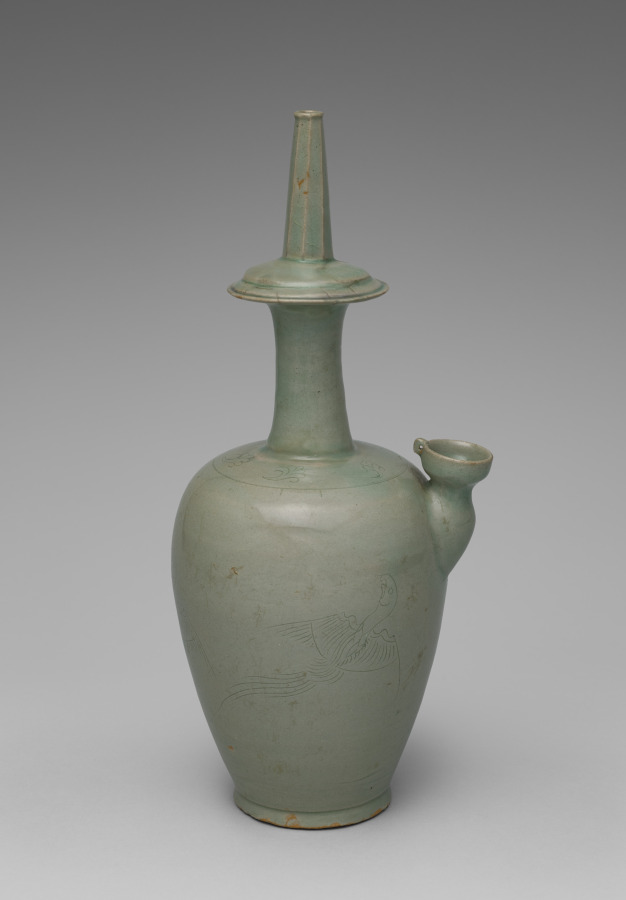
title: Water Ewer for Rituals with Incised Parrot Design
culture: Korea, Goryeo dynasty (918–1392)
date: 1100s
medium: stoneware with celadon glaze, incised and carved decoration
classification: Ceramic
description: This distinctively shaped celadon vessel is a kundika. With a spout on one side, this type of vessel is often used in Buddhist purification rituals. Unlike most existing examples that have an image of a willow tree, this work has a rare flying phoenix design incised on its surface.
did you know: This distinctively shaped vessel is called a kundika in Sanskrit, simply referring to a water bottle.